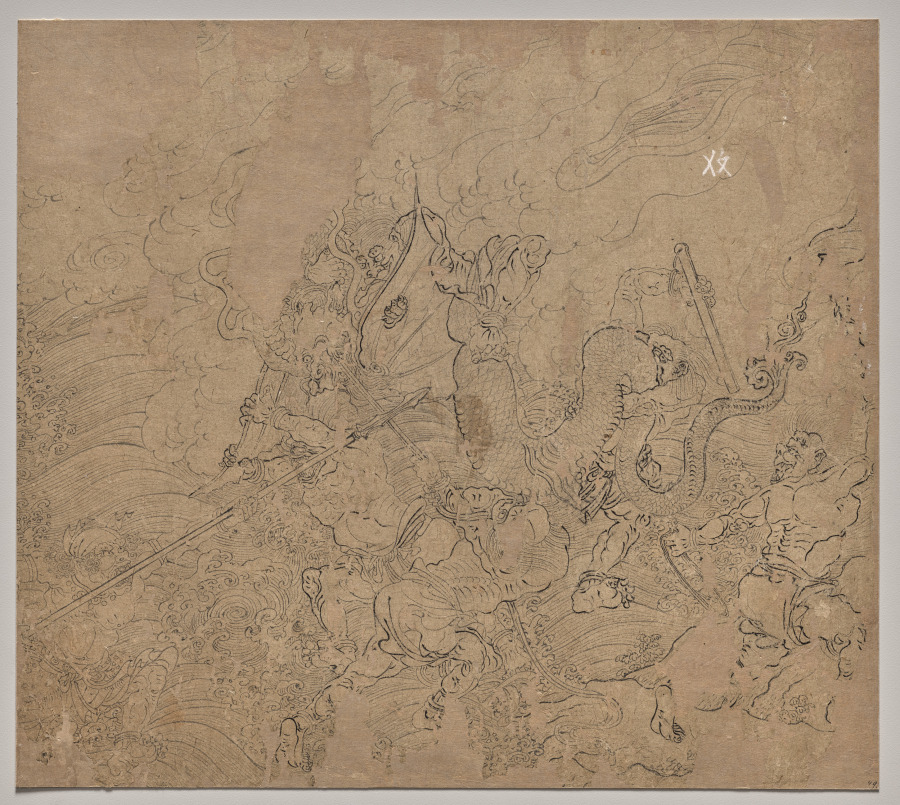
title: Album of Daoist and Buddhist Themes: Search the Mountain: Leaf 49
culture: China, Southern Song dynasty (1127-1279)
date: 1200s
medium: Album, ink on paper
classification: Painting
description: This extraordinary album has 50 paintings on a variety of religious subjects. They were likely created by several master craftsmen to share with studio apprentices as models for fulfilling commissions. The Jade Emperor and the Daoist pantheon make up the first 26 leaves. The next 14 leaves portray the Buddhist Ten Kings of Hell administering punishments to the dead. The third section, called “Clearing the Mountains,” features divine soldiers, led presumably by the deity Erlang Shen 二郎神, fighting undesirable creatures.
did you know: Demon-soldiers attack and chain a vicious, rearing dragon amid splashing waves.